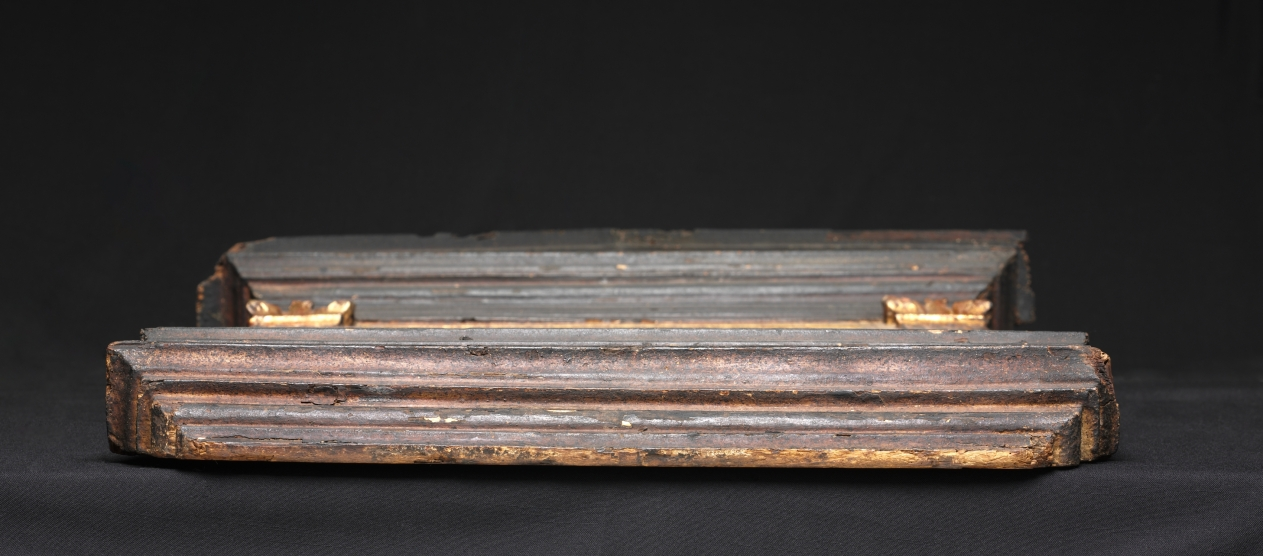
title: Madonna and Child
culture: Italy, 15th century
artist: Luca della Robbia (Italian, 1400?–1482)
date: c. 1460–1470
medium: glazed terracotta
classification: Sculpture